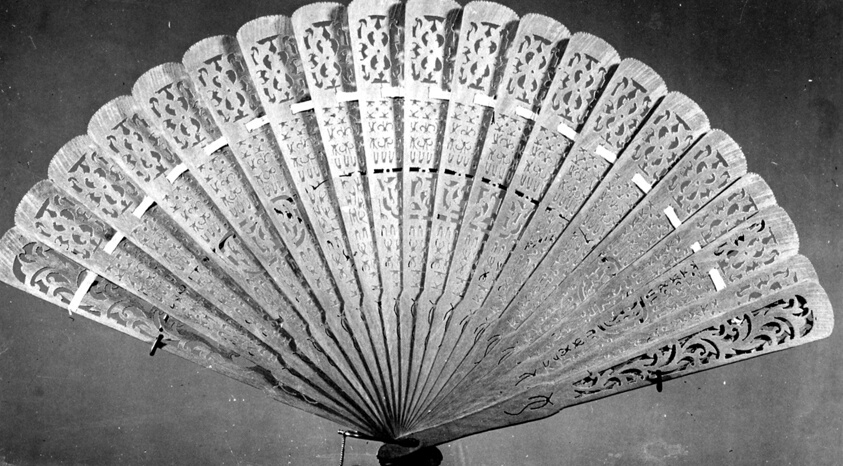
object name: Costume and Accessories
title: Fan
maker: India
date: 19th century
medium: Carved sandalwood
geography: India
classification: textile; fan - misc; costume accessory - folding fan; costume